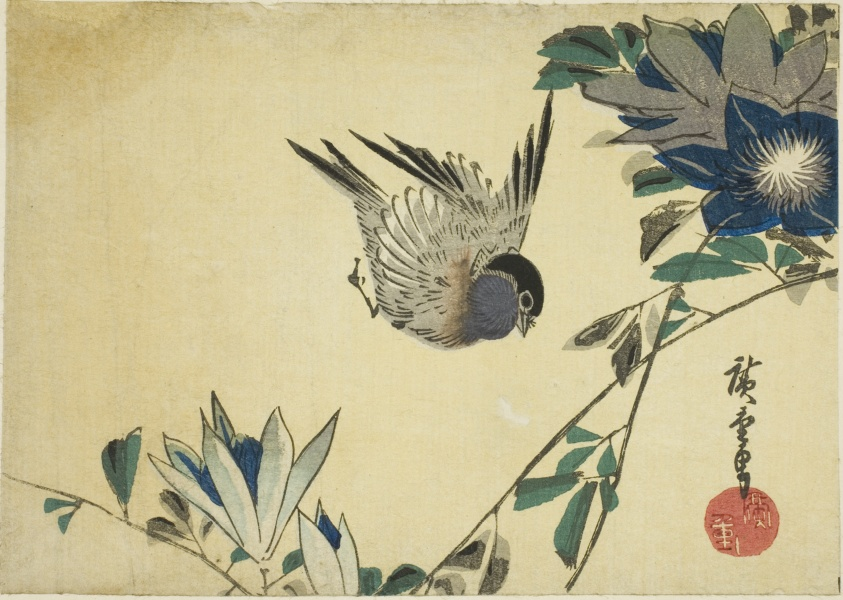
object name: Print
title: Bullfinch and clematis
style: Japanese (culture or style)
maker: Utagawa Hiroshige 歌川 広重; Japanese, 1797-1858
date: 1830s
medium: Color woodblock print; yotsugiriban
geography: Japan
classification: woodblock print; print; asian art